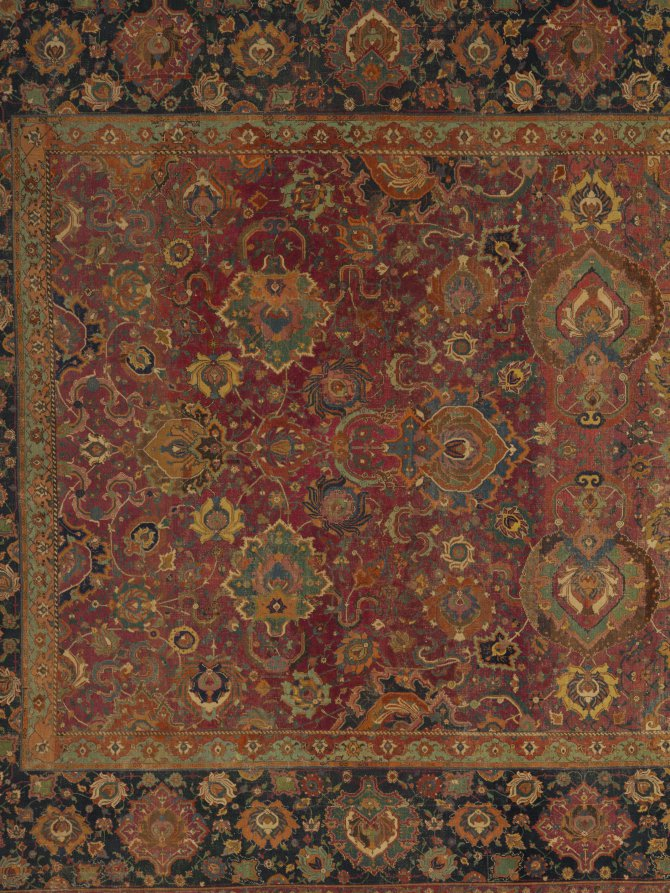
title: Carpet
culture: Iran, Herat, 16th century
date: 1500s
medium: senna knot: wool and cotton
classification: Carpet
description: The Mughals, with their nomadic Central Asian roots, were constantly on the move. They were adept at transporting the trappings of their residences and bases of operation from place to place. Fine carpets and canopies demarcated places of importance, and could be rolled up and moved when the ruler was ready to consolidate his power at a new location. When they settled in stone palaces in India, the interiors were covered with carpets, lending a warmth to the spaces that cannot be felt at the sites today. This carpet is of the type that the Mughals would have acquired for their residences. Mughal paintings are filled with depictions of carpets and textiles, many ornamented, like this one, with delicate and complex palmette-dominated arabesque patterns that evoke a paradisiacal setting.